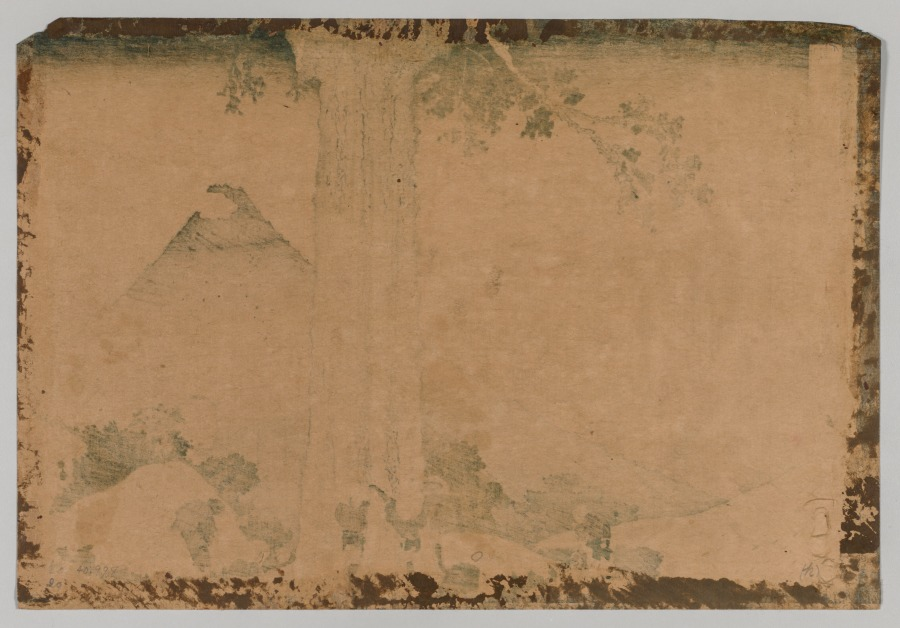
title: Fuji from the Pass of Mishima, Koshu Province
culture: Japan, Edo period (1615–1868)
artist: after Katsushika Hokusai (Japanese, 1760–1849)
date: 1760–1849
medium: color woodblock print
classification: Print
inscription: Signature: Zen Hokusai I-itsu fude